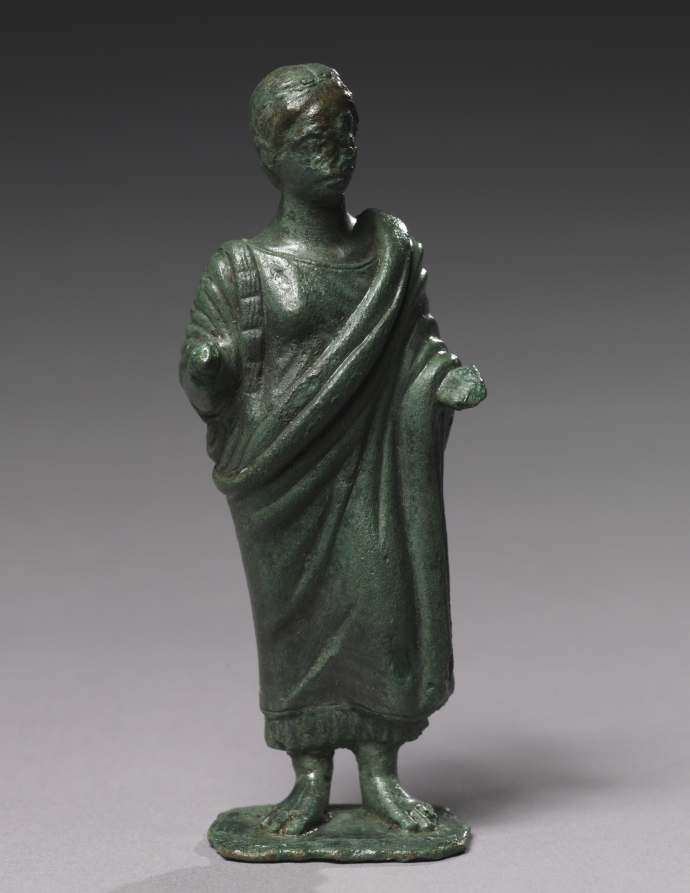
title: Female Statuette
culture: Italy, Etruscan, Archaic period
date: 600–480 BCE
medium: bronze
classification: Sculpture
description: Standing barefoot on a flat base, this woman wears a tunic with a decorated edge, a thick mantle draped over her left shoulder, and a headband. She extends both hands, though the left is damaged and the right missing. Her identity might have been made clear by the attributes she once held—a bird or pomegranate for Turan (the Etruscan analogue to Aphrodite), for example, or an offering dish or vessel for a worshipper.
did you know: The flat, integrated base of this statuette includes an attachment element below.